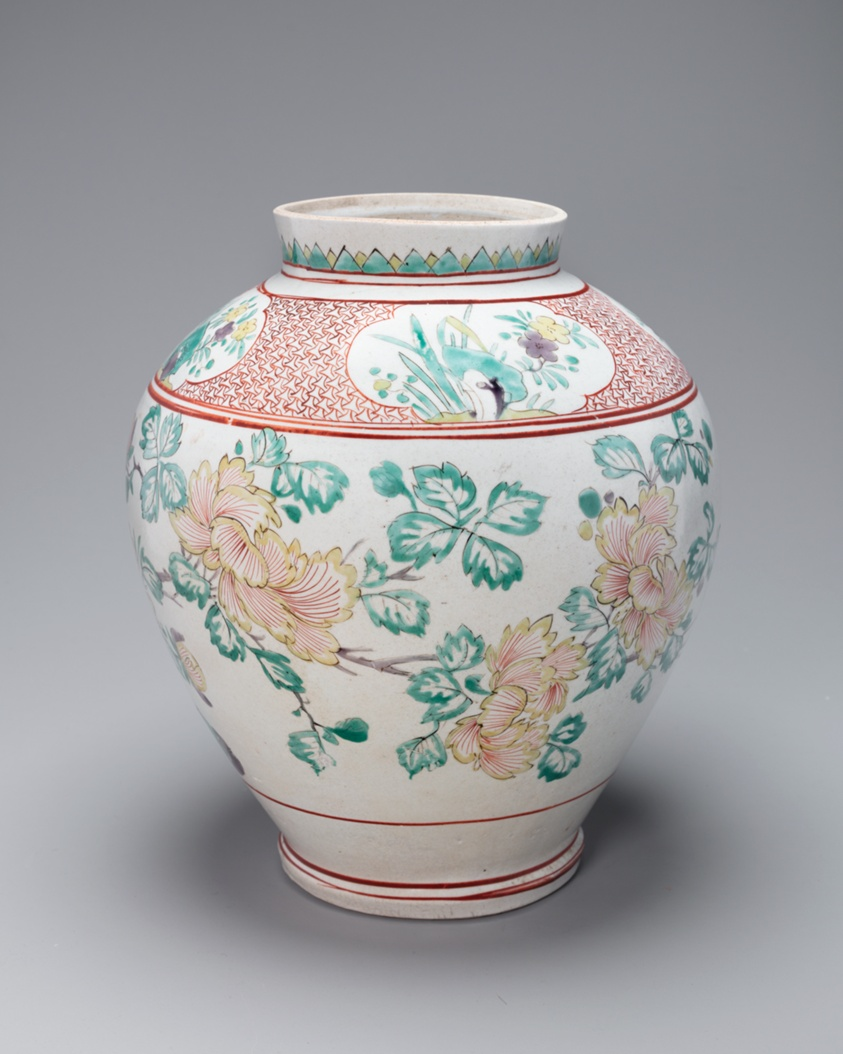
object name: Decorative Arts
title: Jar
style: Japanese (culture or style)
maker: Japanese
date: early Edo Period, early 17th century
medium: Arita ware, Kutani style; porcelain with polychrome enamel glaze decoration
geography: Japan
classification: porcelain; asian art; ceramics; decorative arts